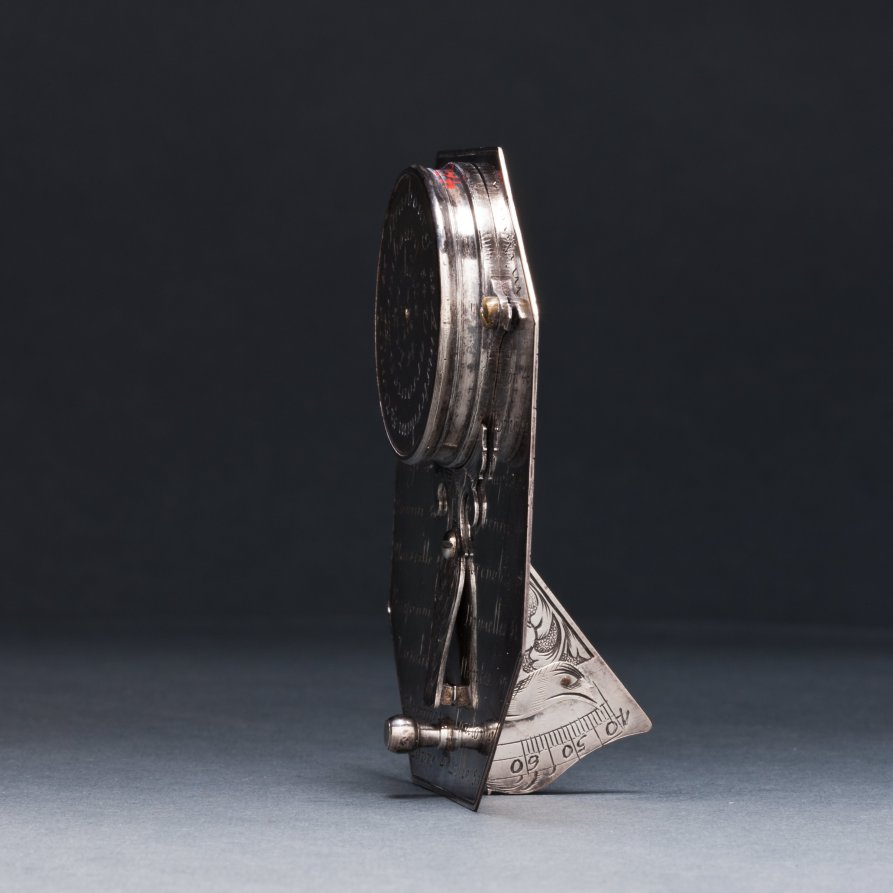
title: Butterfield Sundial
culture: France, 18th century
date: 1700s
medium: silver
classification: Silver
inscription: [Engraved signature above the compass in ribbon band]: "N. BION A Paris"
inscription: [Engraved on the face of the sundial]: “Pour 55° 4-5-6-7-8-9-10-11 50° IIII-V-VI-VII-VIII-IX-X-XI 45° 5-6-7-8-9-10-11 40° -VI-VII-VIII-IX-X-XI'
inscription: [Engraved on the other side]: "Pour 55° -8-7-6-5-4-3-2-1-0 50°-VIII-VII-VI-V-IIII-III-II-I 45°-8-7-6-5-4-3-2-1 40°-VII-VI-V-IIII-III-II-I"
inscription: [Engraved around the compass]: “NORD-OUEST-SUD-EST”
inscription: [Engraved on the back of the sundial]: “Turin 44 Milan 46 Paris 49 Lion 46 Metz 49 Rome 42 Liege 51 Naples 44 Namur 50 Gennes 44 Marseille 43 Grenoble 45 Bayonne 43 Bruxelle 51 Londres 52 Nantes 47 Vienne 48 Toulon 43 Tours 47 Lille 51”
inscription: [Engraved around the back of the compass]: “Venise 45 Strasbourg 49 Amsterdam 52 Hambourg 54 Varsovie 52 La Rochelle 46”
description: Butterfield-type sundials are characterized by their adjustable gnomons, metal flaps that cast a shadow on the dial’s face to indicate the hour, and geographical indices. This sundial has a scale adjustable between latitudes of 40° to 60° north. The latitudes of 26 European towns are engraved on its back for quick reference. With an intricately engraved silver face, it would have functioned as a fashionable traveler’s accessory.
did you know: Butterfield-style sundials were named after Micheal Butterfield, an English scientific and mathematical instrument maker who worked in Paris between 1674 and 1724.